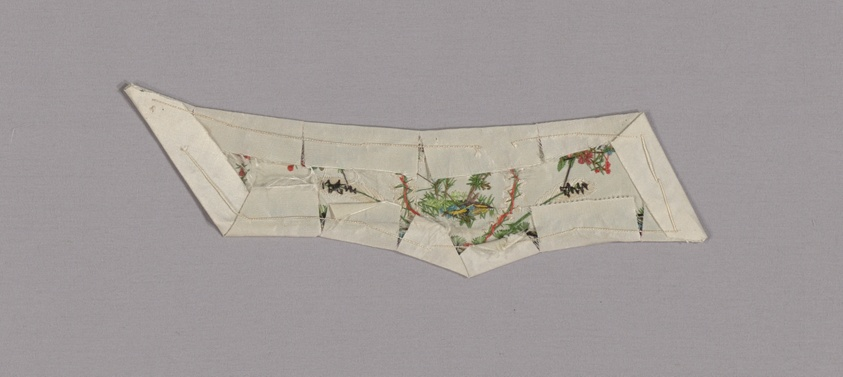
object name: Costume and Accessories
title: Embroidered Fabric for a Man's Waistcoat Front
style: 18th Century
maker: France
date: 1780s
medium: Silk, plain weave; embroidered with silk thread in individual back, outline, running, satin, split and stem stitches; couching; laid work and French knots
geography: France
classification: costume; needlework (visual works); waistcoat (garment); textile; costume - embroidery; needlework - costume; garment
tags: floral motifs, flowers, foliage, white (color), green (color), pink (color), building, floral, bird, wreaths, feathers, fashion, houses